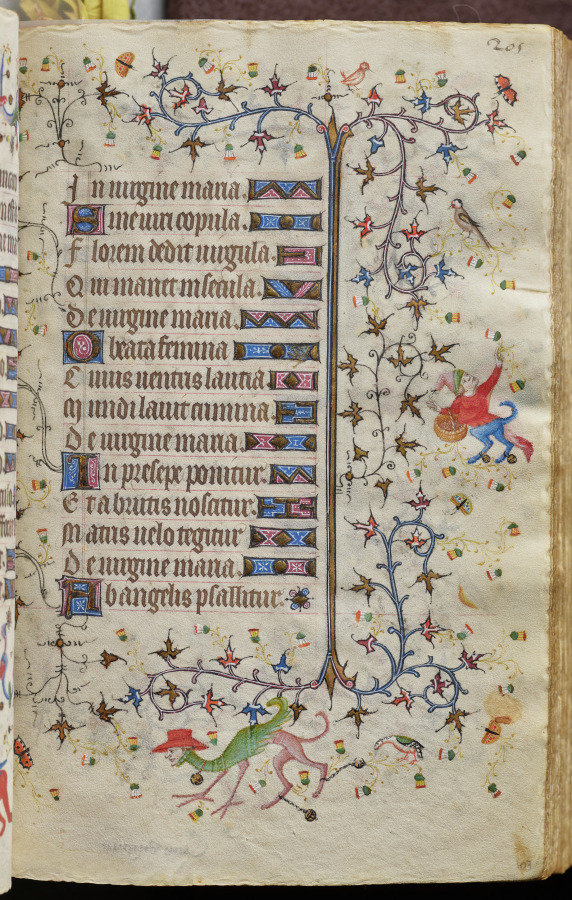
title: Hours of Charles the Noble, King of Navarre (1361-1425): fol. 103r, Text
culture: France, Paris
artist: Master of the Brussels Initials and Associates (French)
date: c. 1405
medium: ink, tempera, and gold on vellum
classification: Bound Volume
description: This precious volume was obviously highly prized by its owner, the French-born King of Navarre, who had his coat of arms painted on no less than twenty folios. Rather than directly commissioning this manuscript from a specific workshop, it seems that Charles the Noble acquired his book of hours -- perhaps ready-made for the luxury market -- while on a trip to Paris in 1404-05. A collaborative effort, six painting styles are evidenced within the pages of this codex, those of two Italians, two Frenchmen, and two Netherlanders. The painter who was responsible for the planning and decoration of the book, and who produced seventeen of the large miniatures, was a Bolognese artist known as the Master of the Brussels Initials. His principal assistant, responsible for most of the borders, was a Florentine who signed his name "Zecho" da Firenze on folio 208 verso.